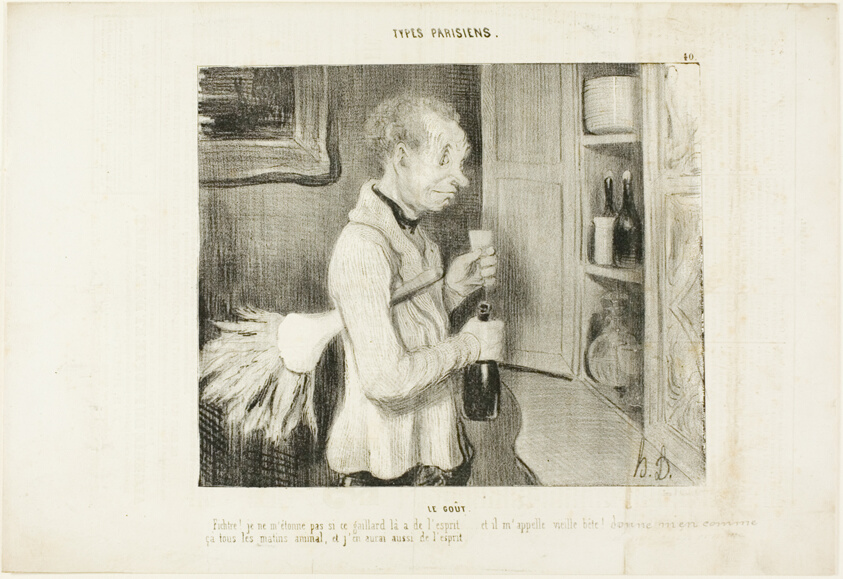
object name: Print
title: The Taste. “Wow! I am not surprised any more why this fellow is so spirited... and he calls me an old beast! Let me have one of these every morning, and I will be full of spirit too,” plate 40 from Types Parisiens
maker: Honoré Victorin Daumier; French, 1808-1879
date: c. 1839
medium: Lithograph in black on white wove paper, with letterpress verso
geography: France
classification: lithograph; print; prints and drawing